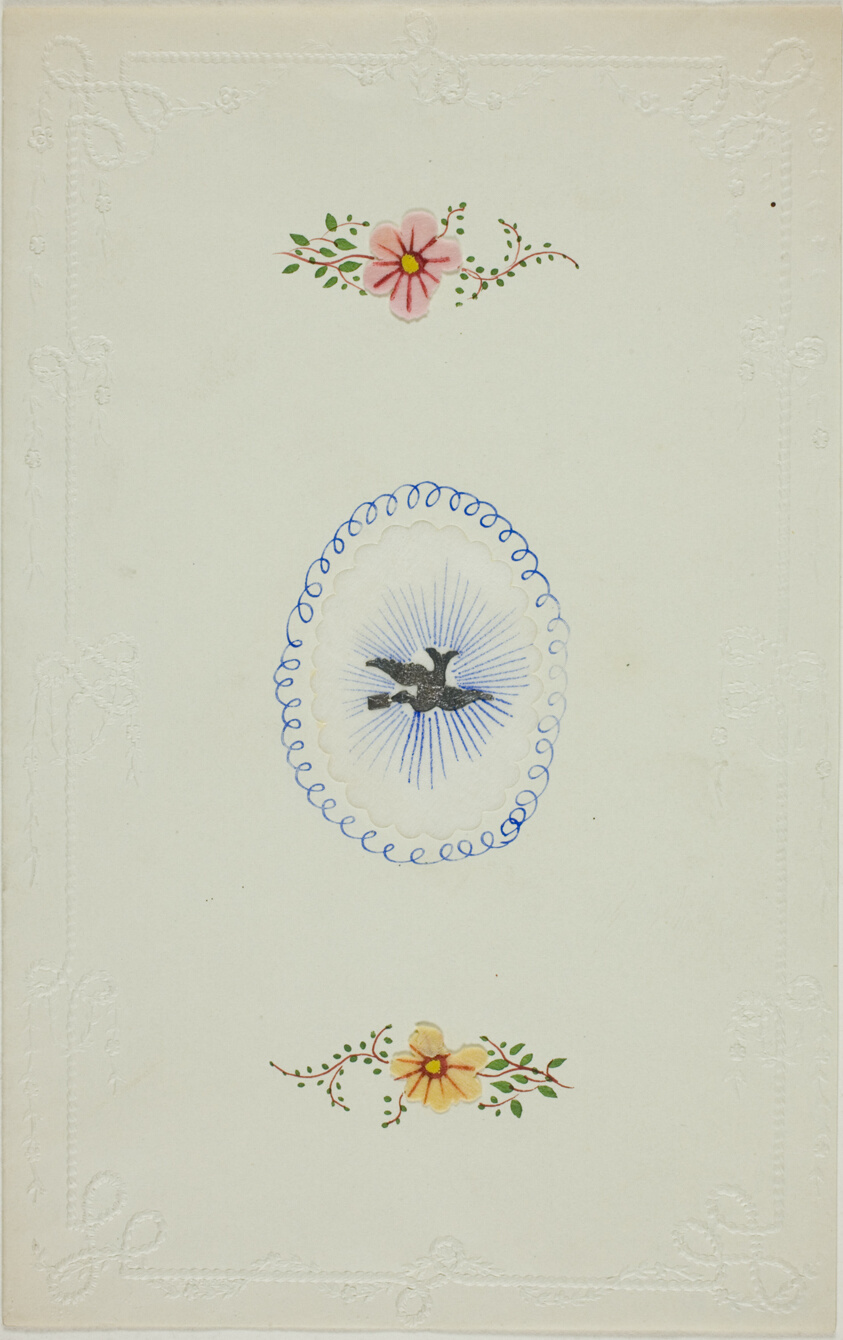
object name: Drawing and Watercolor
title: Untitled Valentine (Silver Dove)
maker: George Kershaw (English, 19th century)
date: c. 1850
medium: Collaged elements with watercolor and pen and blue ink on cut and embossed ivory wove paper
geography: England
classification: valentine; prints and drawing; paper